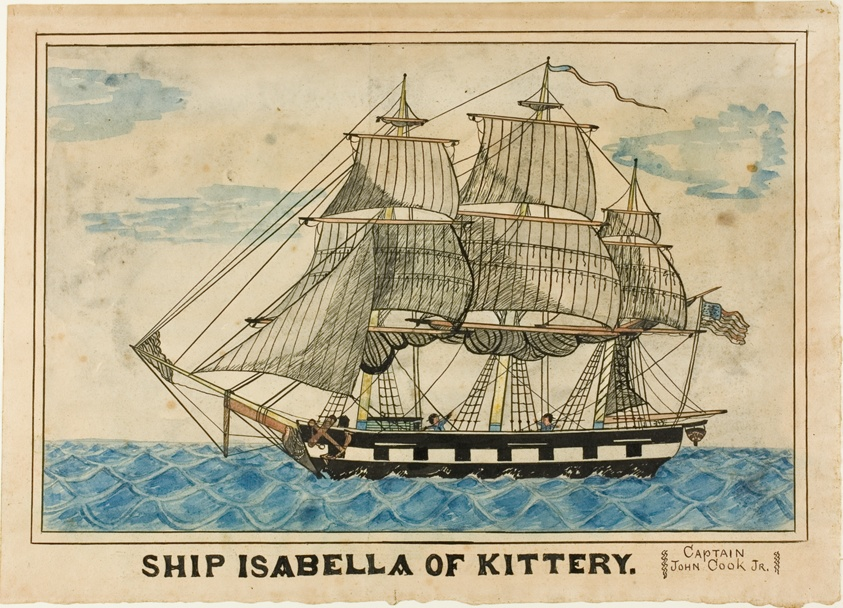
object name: Drawing and Watercolor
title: Ship Isabella of Kittery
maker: Unknown Artist; American, 19th century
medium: Pen and black ink, with watercolor, over graphite, on cream wove paper (discolored)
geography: United States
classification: watercolor; drawings (visual works); prints and drawing